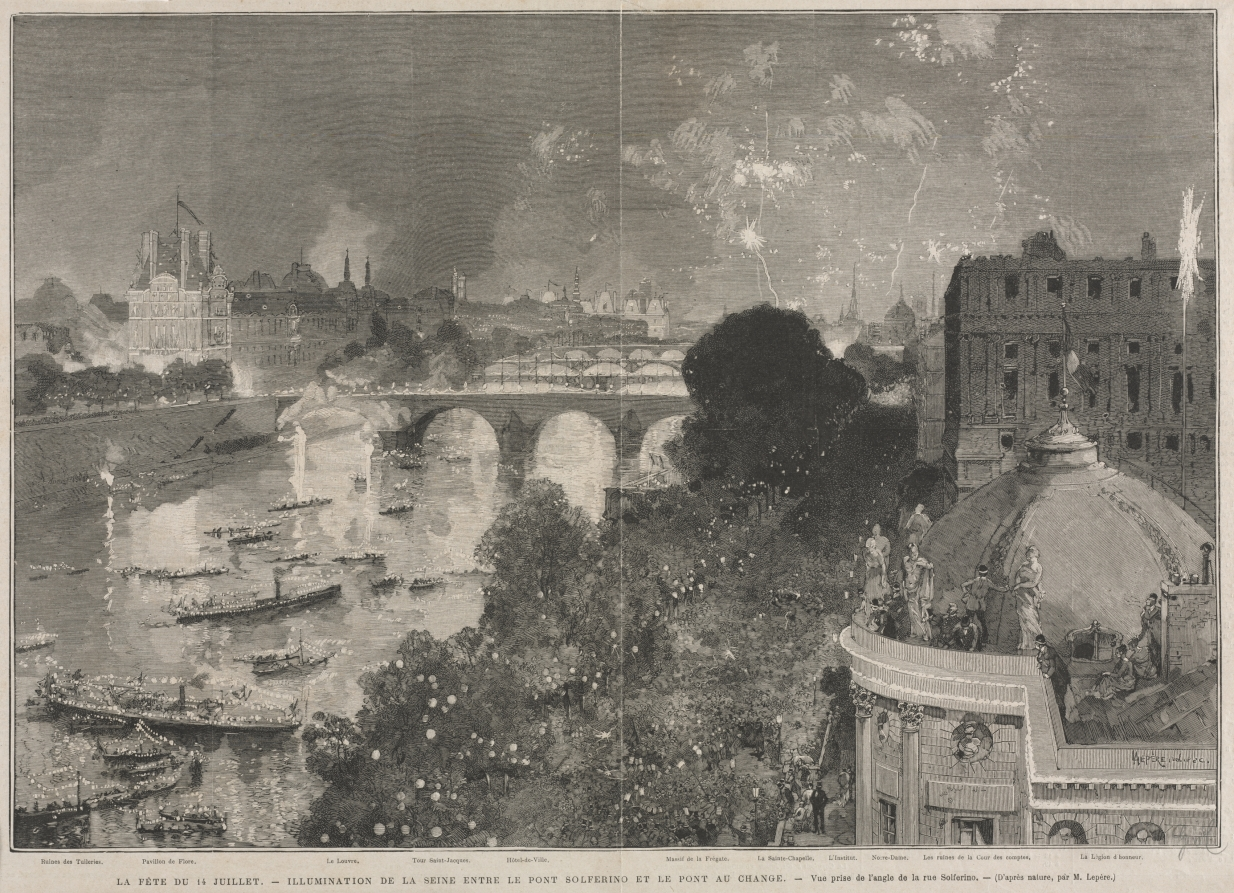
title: The Festival of 14 July, Illumination of the Place of the Republic (after H. Scott)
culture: France, 19th century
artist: Auguste Louis Lepère (French, 1849–1918)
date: 1880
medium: wood engraving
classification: Print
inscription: signed in pencil, lower right margin: A. L. (?)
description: An abundance of lanterns and fireworks light the night sky in this Parisian scene. Revelers scramble atop roofs, balconies, bridges, and ships to join in the celebration of a warm Bastille Day, which honors the birth of the French Republic. The French constitution allows its President to pardon crimes on this day, a tradition that continues today.